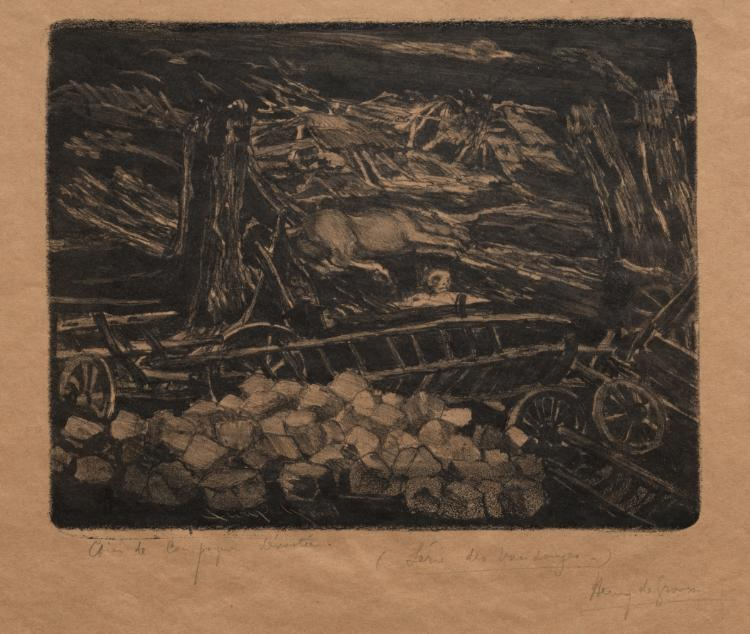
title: The Vintages!: Place of Devestation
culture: Belgium, 19th century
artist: Henri de Groux (Belgian, 1867–1930)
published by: Proof from an unpublished suite of lithographs intended to be published by L'Estampe Originale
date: 1894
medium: lithograph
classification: Print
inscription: lower right margin, in graphite: Henri De Groux; lower left margin corner, in graphite: Coin de Campagne devestée. (Serie des Vendages)